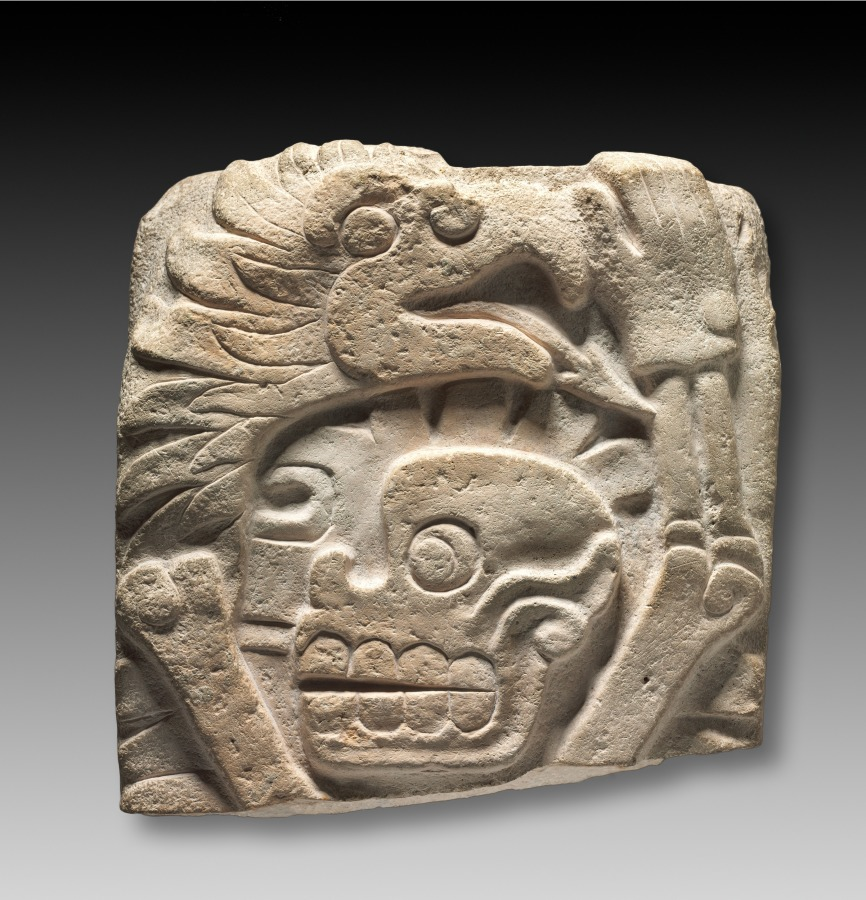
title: Stela Fragment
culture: Mexico, Veracruz?, 600-950 AD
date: 600–950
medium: limestone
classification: Sculpture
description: Figures appear on two sides of this fragmentary stela (upright stone slab carved in relief). One seems to represent a grimacing warrior who brandishes a club; arrow-like darts festoon his belt and hair. On the other side is a skeleton with one fleshed hand, perhaps a sacrificed captive. The eagle with a leaf in its mouth is a hieroglyph that may identify the captive's name.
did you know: The skeletal being resembles a low-relief stucco death figure on the wall of Tomb 1 in Zaachila.